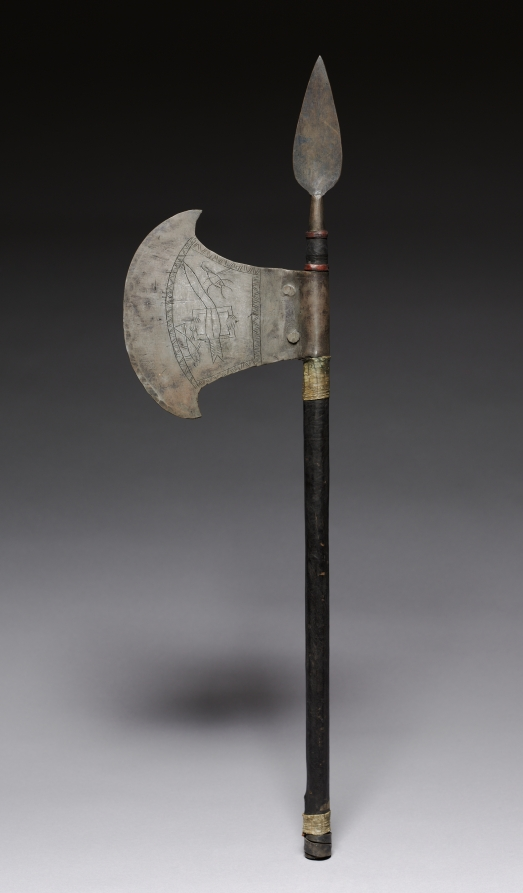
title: Axe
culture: Africa, unknown maker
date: 1900s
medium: iron and leather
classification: Arms and Armor